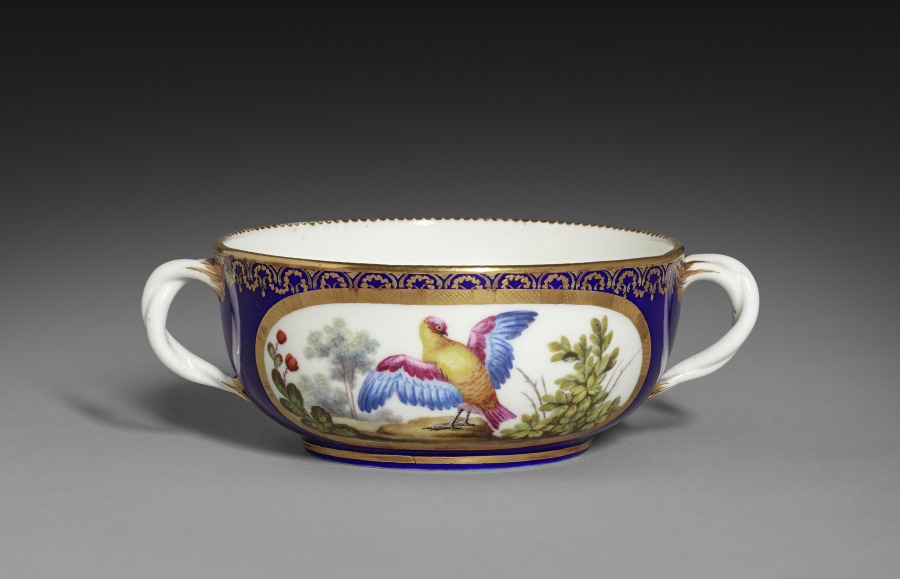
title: Broth Bowl (Écuelle Ronde)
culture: France, Sèvres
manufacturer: Sèvres Porcelain Factory (French, est. 1756)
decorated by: François-Joseph Aloncle (French)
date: 1772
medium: soft-paste porcelain with enamel and gilt decoration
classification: Ceramic